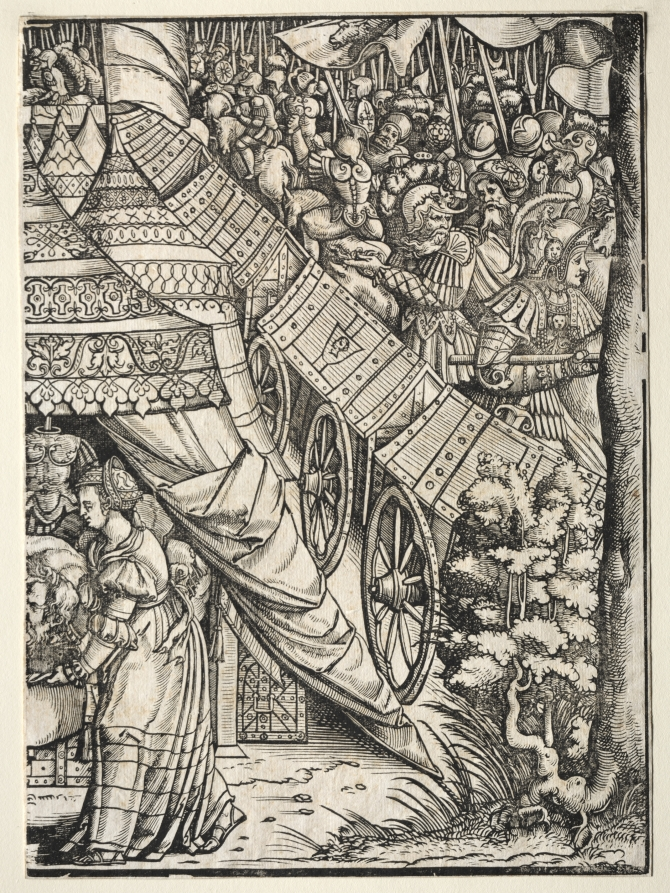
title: Judith with the Head of Holifernes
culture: Germany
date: 1500s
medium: woodcut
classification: Print